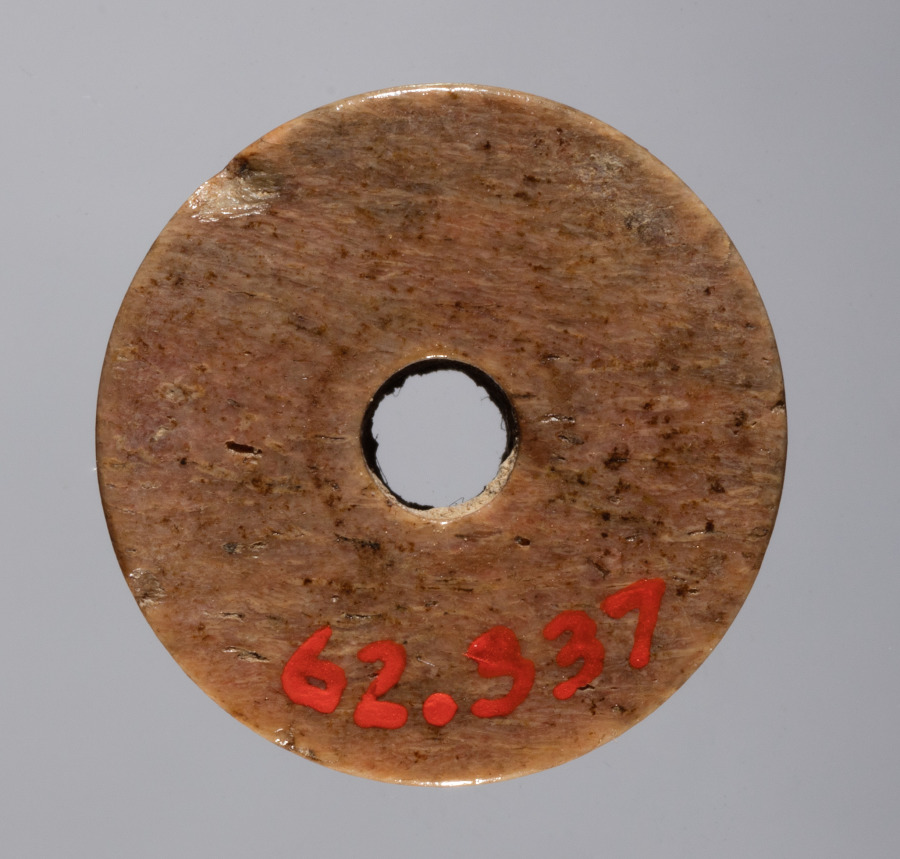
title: Spindle Whorl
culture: Iran, early Islamic period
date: 700s - 900s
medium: bone, incised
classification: Spindle Whorl